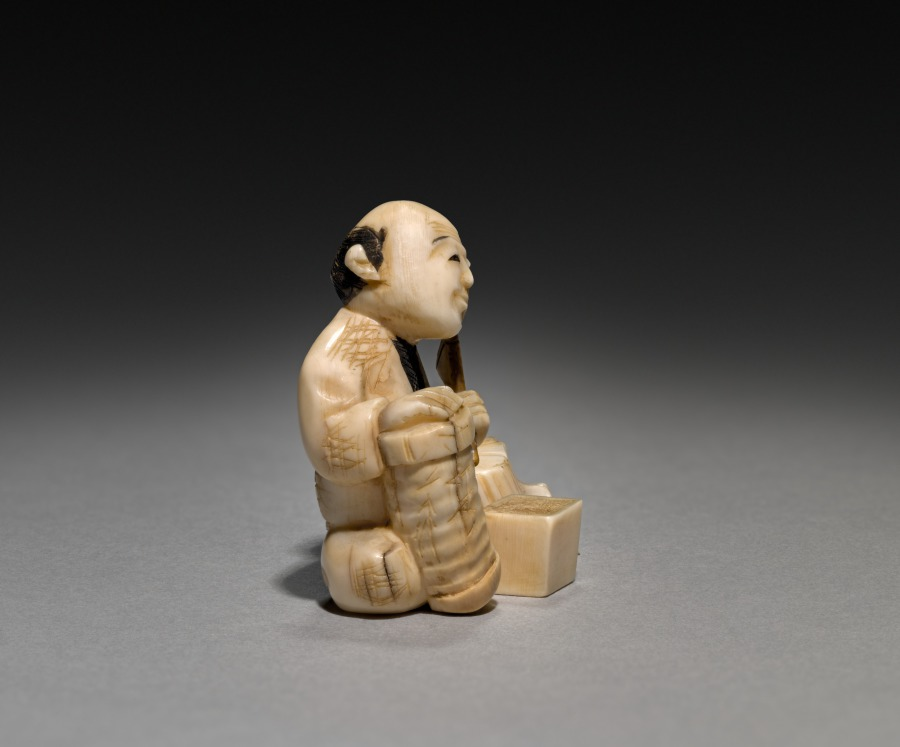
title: Man with Brush and Lantern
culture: Japan, Meiji period (1868–1912)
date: early 1900s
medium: ivory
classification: Ivory